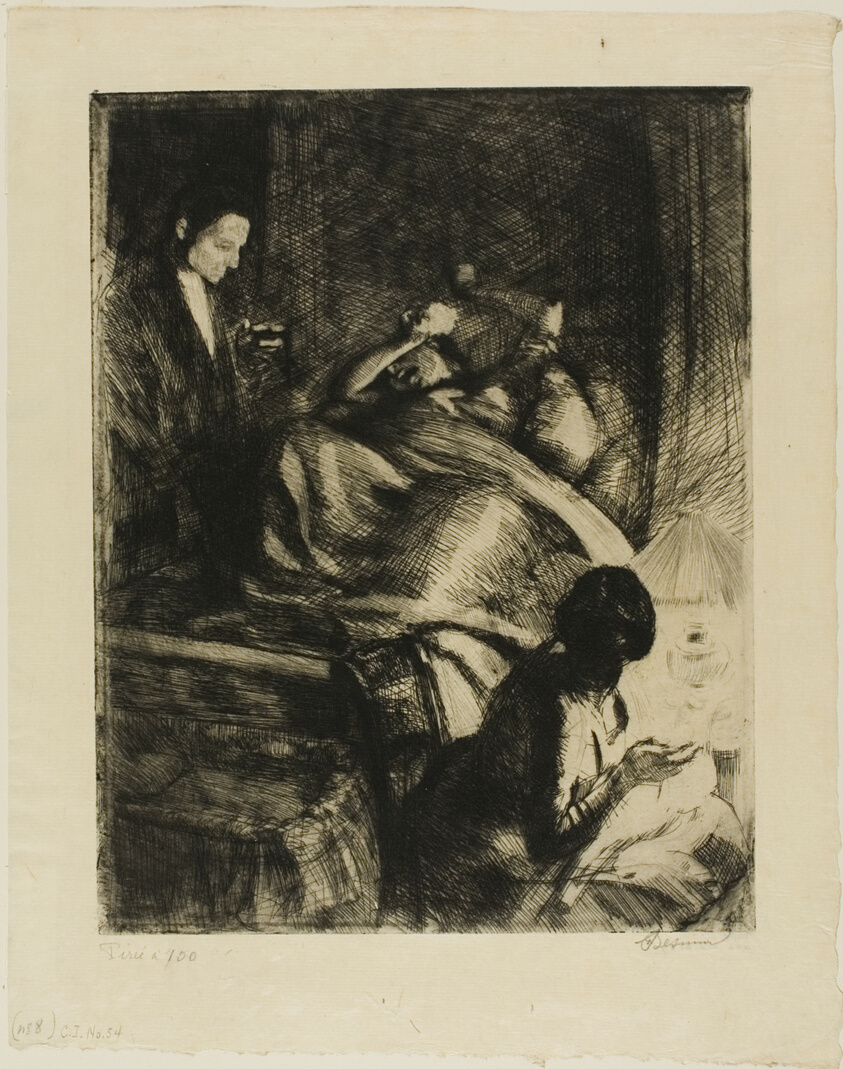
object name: Print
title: Delivery, plate three from Woman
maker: Albert Besnard (French, 1849-1934)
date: c. 1886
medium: Etching and drypoint and aquatint on cream Japanese paper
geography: France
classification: etching; print; prints and drawing